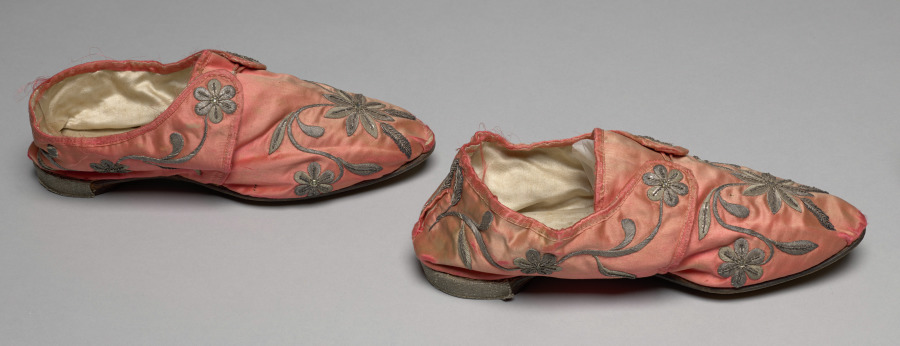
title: Pair of Slippers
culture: Italy, Venice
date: early 1700s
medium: Silk: satin weave with silver metal thread embroidery and trim; spangles; leather soles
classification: Garment